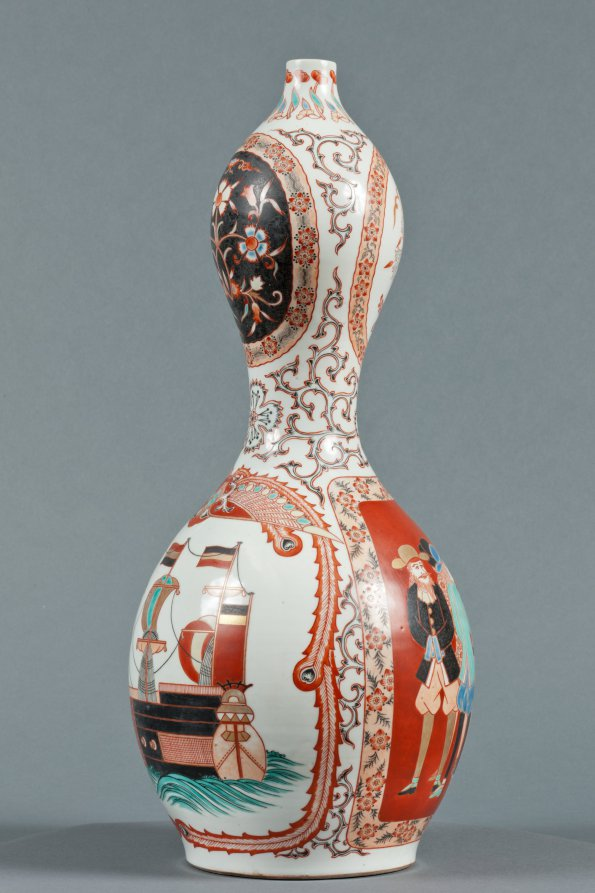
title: Bottle with Western Ships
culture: Japan, Edo period (1615–1868)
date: c. 1800–1868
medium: Porcelain with decoration in colored enamels and underglaze blue, overglaze enamels, and gold (Hizen ware, Arita type)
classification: Ceramic